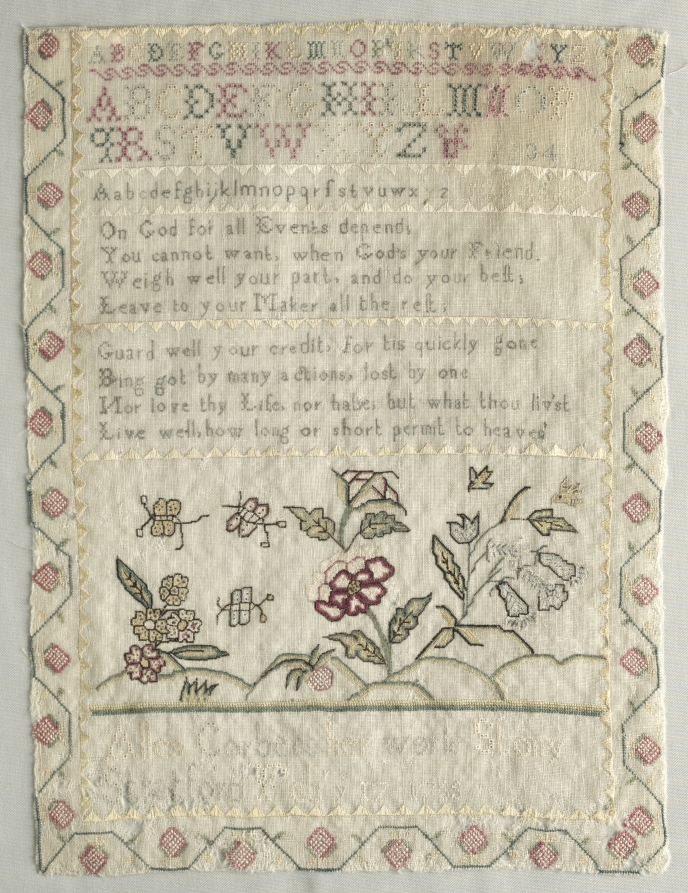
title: Sampler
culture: England, Stony Stratford, 18th century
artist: Alles Corbett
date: February 17, 1755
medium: wool scrim, silk cross and satin stitches, eyelet and petite point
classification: Sampler